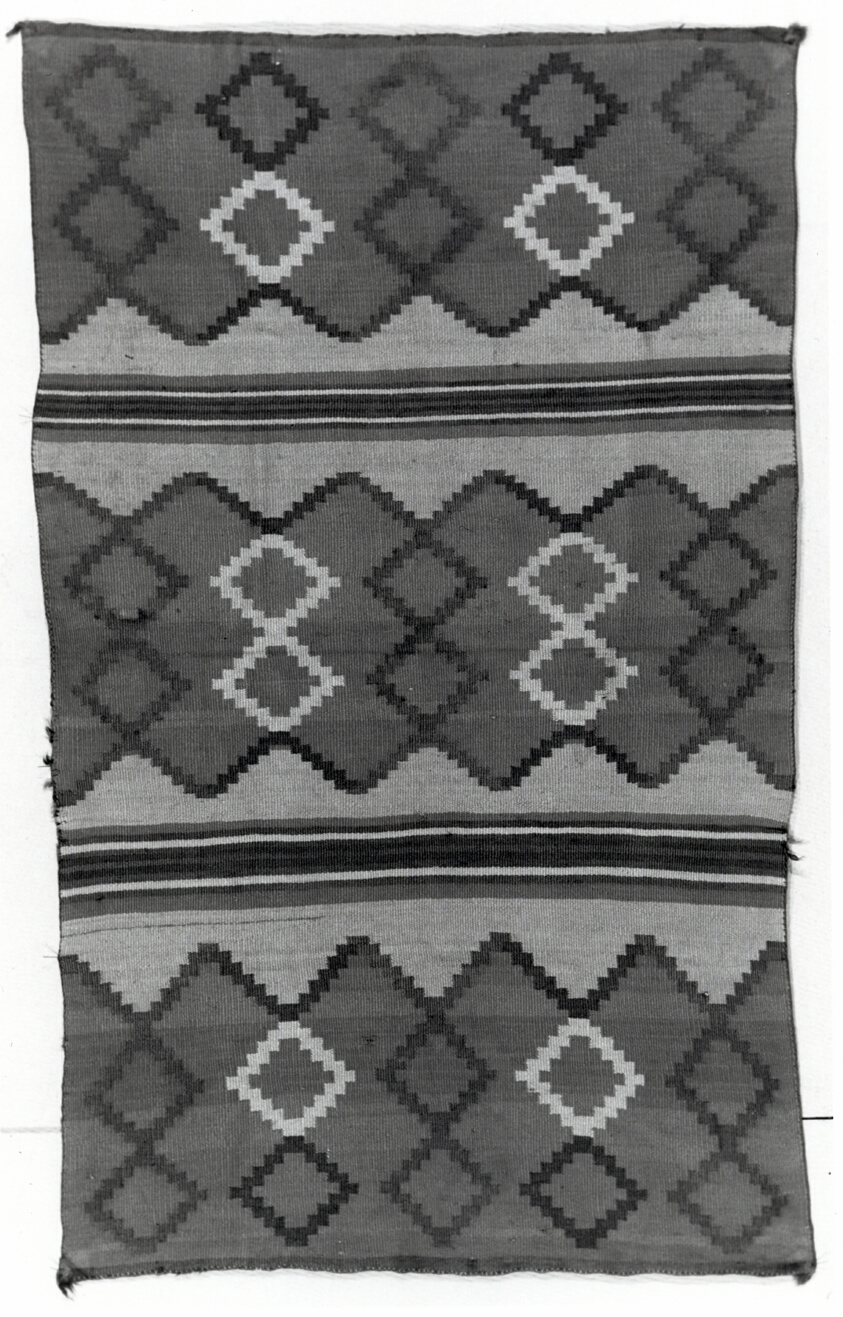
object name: Textile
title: Blanket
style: navajo, native american, americas, Folk Art, indigenous, north american, native north american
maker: Navajo (Diné) (Arizona, New Mexico, and Utah, United States)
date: c. 1865/75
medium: Wool, single interlocking tapestry weave; twined selvages, heading and finish terminating in tassels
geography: Navajo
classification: textile; weaving